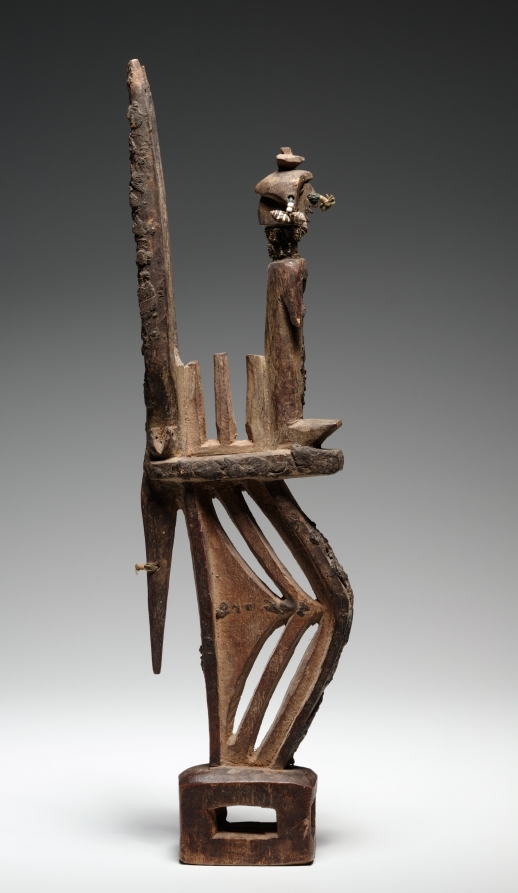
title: Headdress (chi wara)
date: early 1900s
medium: Wood, metal, glass beads, seashells, string, and probably tar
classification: Mask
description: Chi wara—a mythical “farming beast”—was said to teach farming to the Bamana people. Carved patterns cover this female chi wara’s body, highlighting its muscles and emphasizing that it is no earthly animal, but rather an agricultural spirit that combines human, antelope, and anteater elements. This example emphasizes vertical space, with a kneeling human figure on the back. The figure is adorned with imported beads as well as small shells. Accompanied by women’s songs, male performers danced paired male-and-female chi wara headdresses affixed to basketry caps at agricultural competitions and weddings.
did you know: Chi wara headdresses look different depending on the region in which they were made.